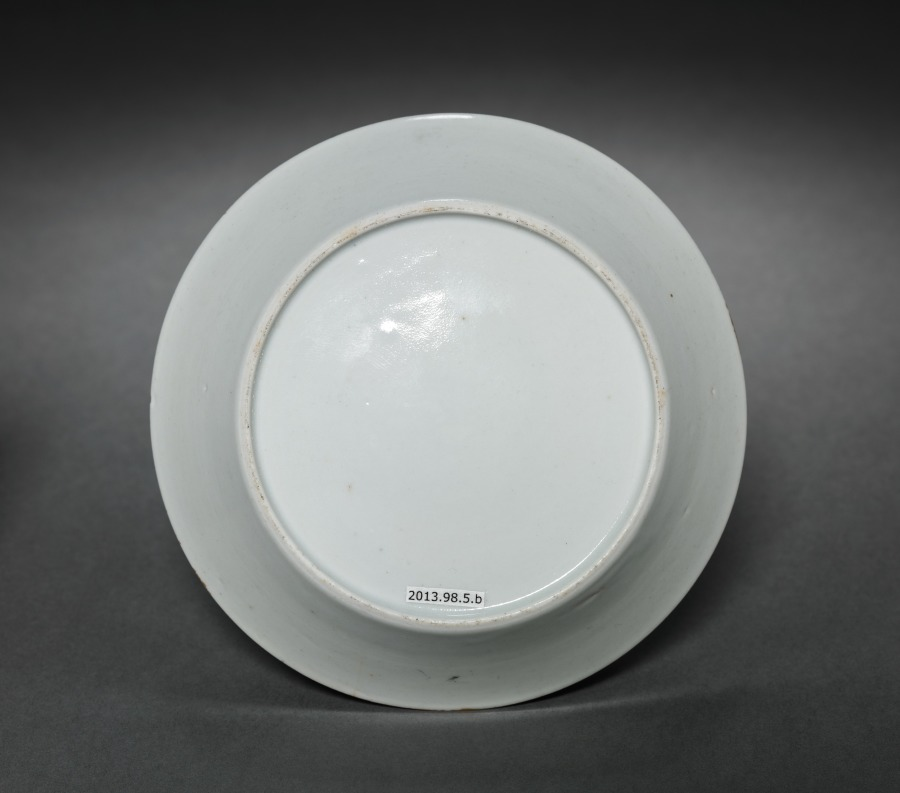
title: Saucer from Oliver Wolcott, Jr. Tea Service (5 of 6)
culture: Chinese Export porcelain, late 18th-early 19th century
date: 1785–1805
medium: porcelain, sepia enamel, gold leaf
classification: Ceramic